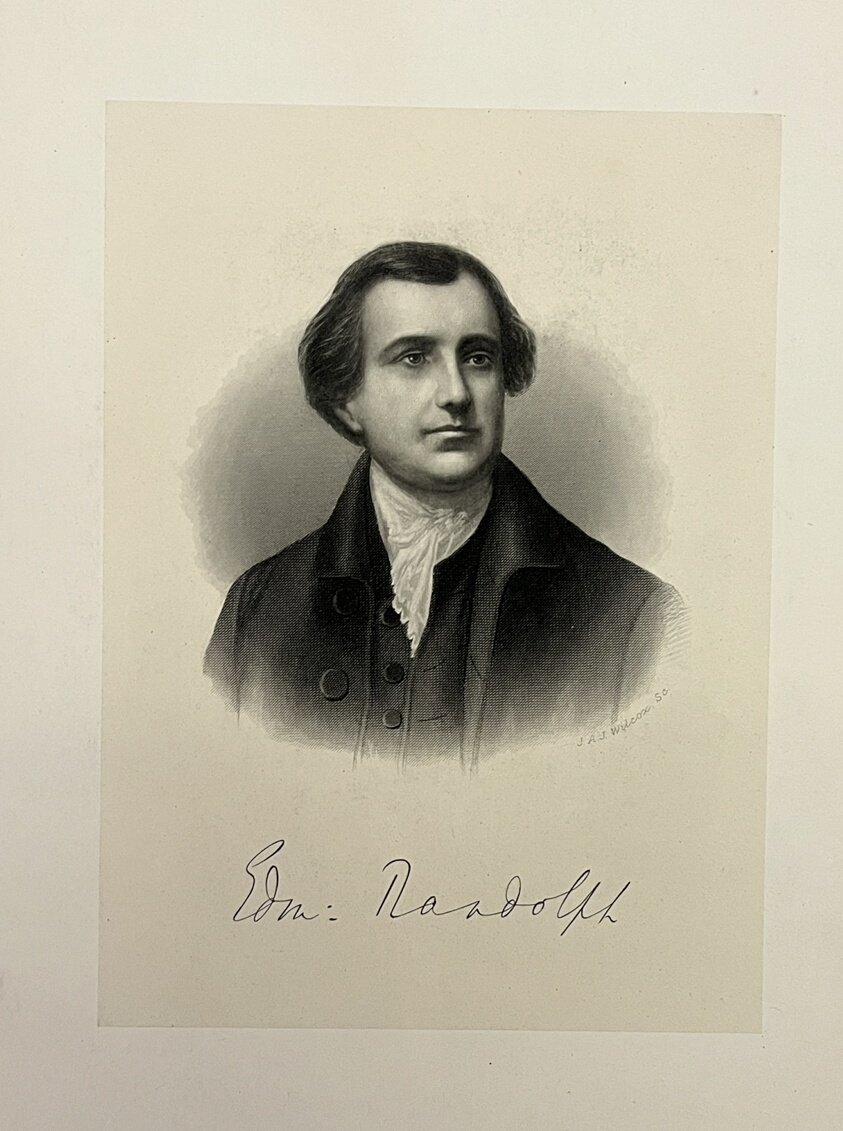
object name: Print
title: Edward Randolph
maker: John Angel James Wilcox (American, born 1835)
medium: Lithography on paper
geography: United States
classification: reproduction; print; prints and drawing